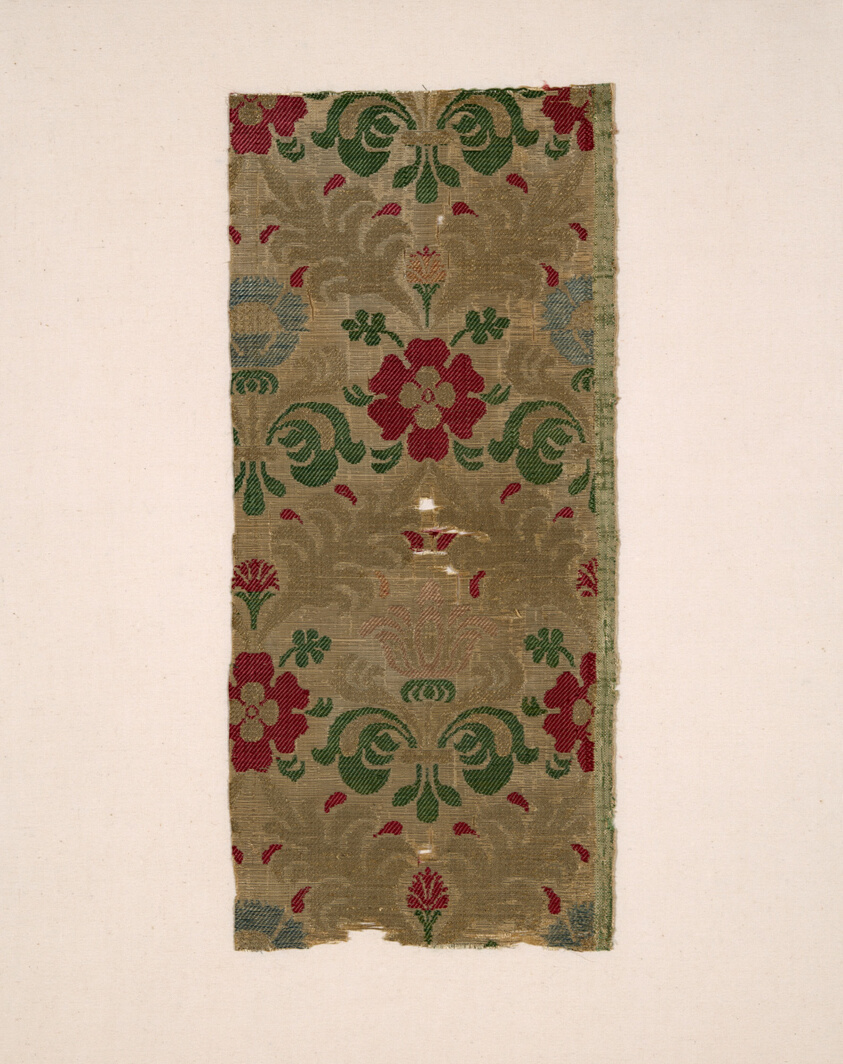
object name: Textile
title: Fragment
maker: Italy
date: 1625/75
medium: Silk and gilt-metal-strip-wrapped silk, plain weave with supplementary facing wefts and supplementary brocading wefts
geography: Italy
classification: textile; weaving